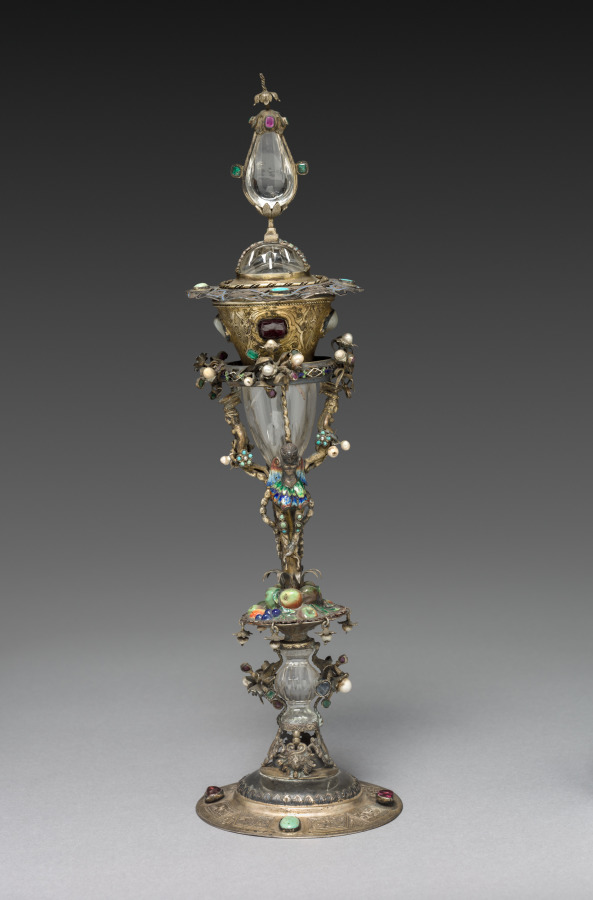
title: Blood Reliquary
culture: Italy (?), 16th century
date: 1500s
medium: gilt silver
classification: Metalwork